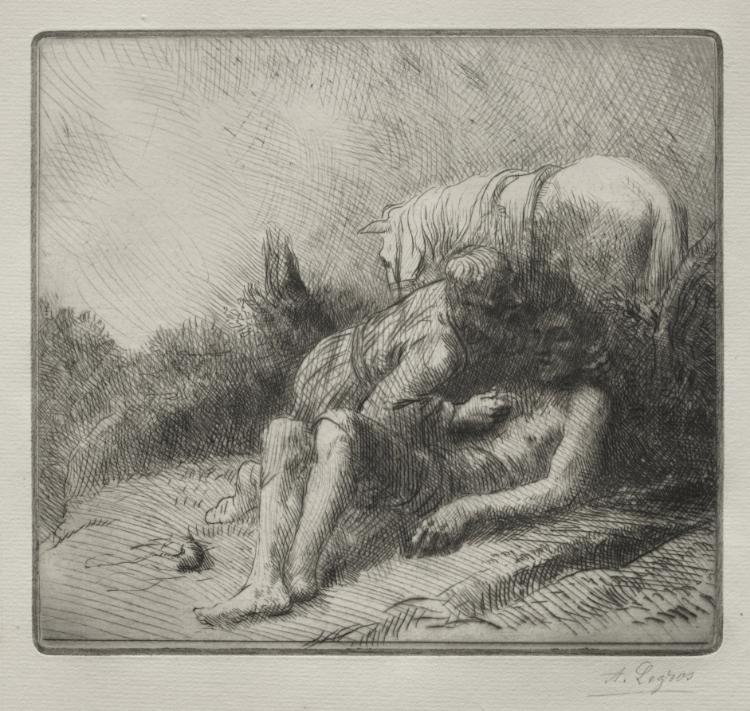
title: The Good Samaritan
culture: France, 19th-20th century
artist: Alphonse Legros (French, 1837–1911)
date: c. 1857–1911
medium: etching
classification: Print